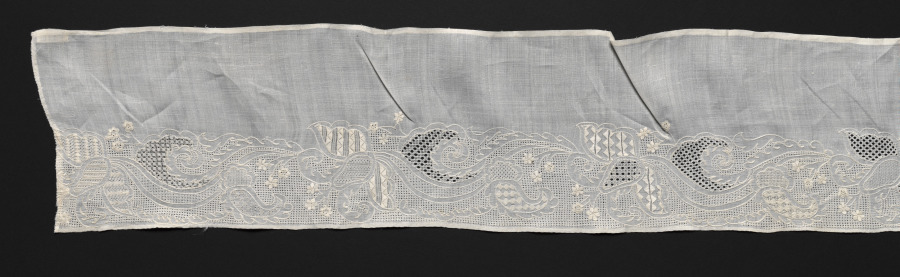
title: Embroidered Band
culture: France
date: 1800s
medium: Plain weave linen: needle lace (cutwork and drawnwork) and embroidery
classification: Embroidery